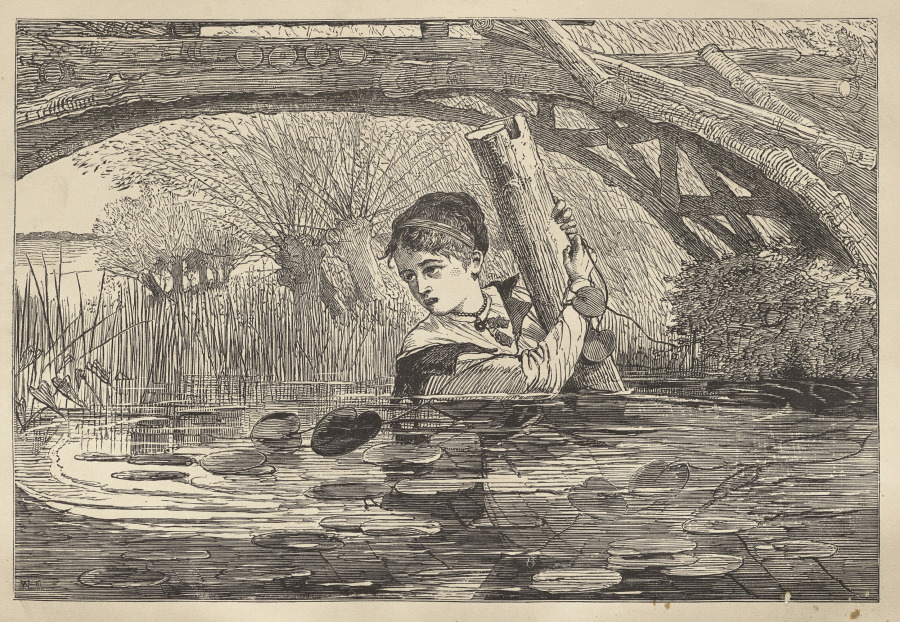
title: "Orrin, Make Haste, I Am Perishing"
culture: America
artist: Winslow Homer (American, 1836–1910)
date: 1868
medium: wood engraving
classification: Print